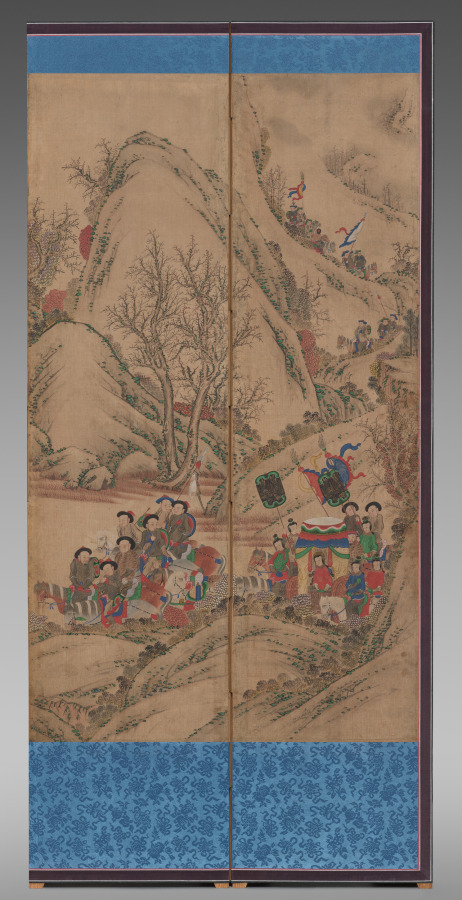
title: Hunting Scene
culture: Korea, Joseon dynasty (1392–1910)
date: 1800s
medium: eight-panel folding screen; ink and color on silk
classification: Painting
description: The theme of nomad warriors riding horses and hunting wild animals was first painted in the Qing imperial court in China in late 1600s. But it became favored by the Korean royal court and painted by the royal court painter in the late 1700s. The Joseon Korean ruling class members considered Qing nomad warriors to be "barbaric," yet highly admired their hunting and military skills. By the late 1800s, folding screens with the hunting scene were used largely for this dynamic and exotic feature.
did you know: The theme of nomad warriors hunting became highly appreciated in the Korean royal court of the 1700s for the king's particular interests in strengthening the royal army's military prowess.